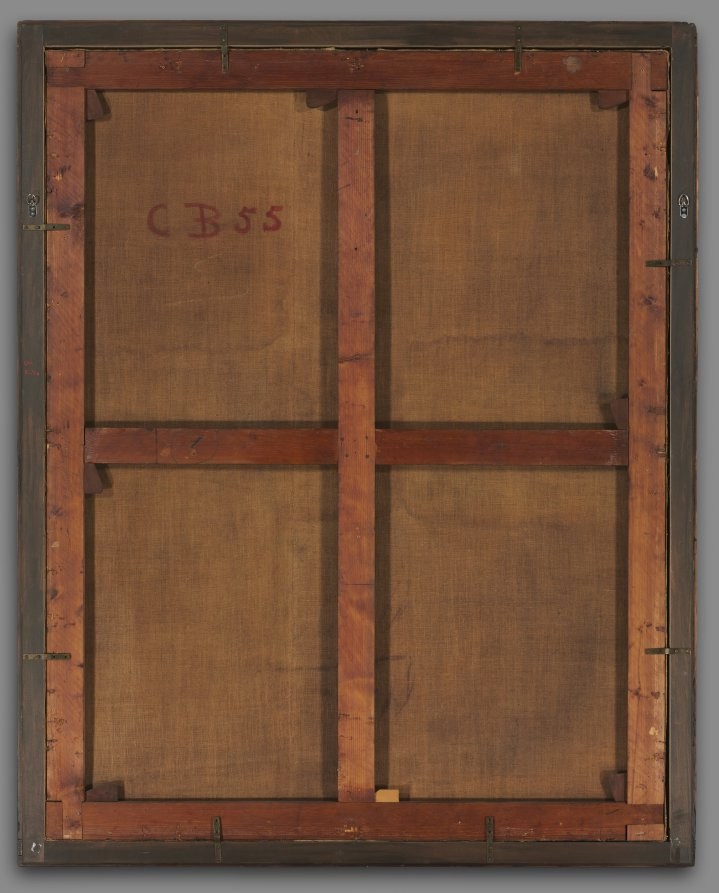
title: Saints Presenting a Devout Woman to the Virgin and Child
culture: Italy, 18th century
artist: Giovanni Battista Pittoni (Italian, 1687–1767)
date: 1720s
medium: oil on canvas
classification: Painting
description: A devout woman, shown at lower right, is presented by saints and an angel to the central Virgin and Child. In clockwise order from her is Saint Lucy, identified by the cauldron and sword at her feet; Saint Agnes, by the lamb; Saint Scholastica, by the dove she holds; and Saint Benedict, characterized by his crozier and Benedictine habit. Slightly below the central Madonna is Saint Veronica, whose head is covered. Behind Saint Veronica, Saint Anthony of Padua, wearing a Franciscan habit and holding a lily stalk, stands in a pose of adoration. Below Saint Anthony and next to the woman is an angel. The identity of the woman is uncertain, but she may be the painting's patron. Pittoni uses dramatic gestures and elegant drapery, while the soft treatment of light and rich colors reflect Pittoni's study of French Rococo art during his stay in France in 1720. In the crowded composition, Pittoni has emphasized the importance of the religious event. His experimentation with composition is evident in the legs of Saint Agnes's lamb; as the painting has aged, a third front leg that Pittoni had painted over has become visible.